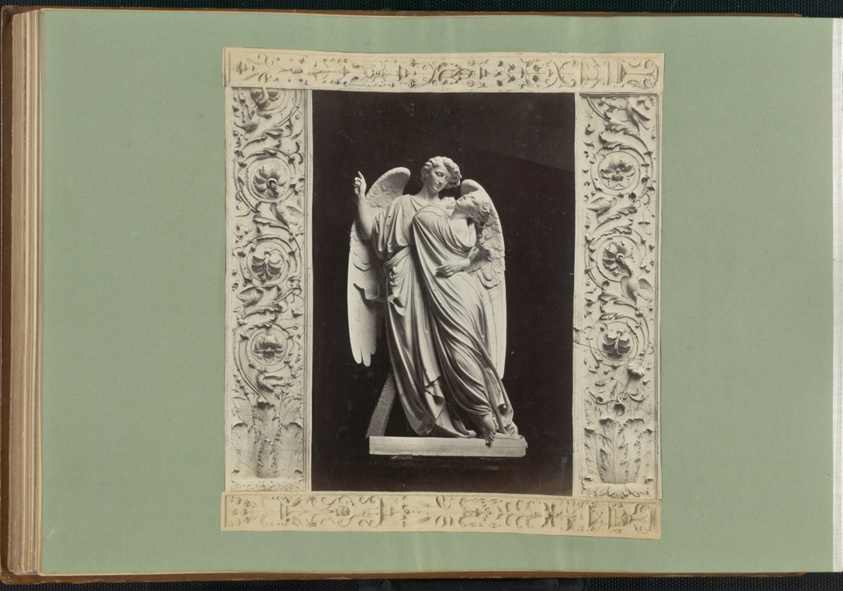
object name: Photograph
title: The Madame B Album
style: 19th century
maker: Marie-Blanche Hennelle Fournier (French, 1831–1906)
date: 1870s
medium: Albumen print with watercolor (in album)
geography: France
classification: photograph; albumen silver print; photography